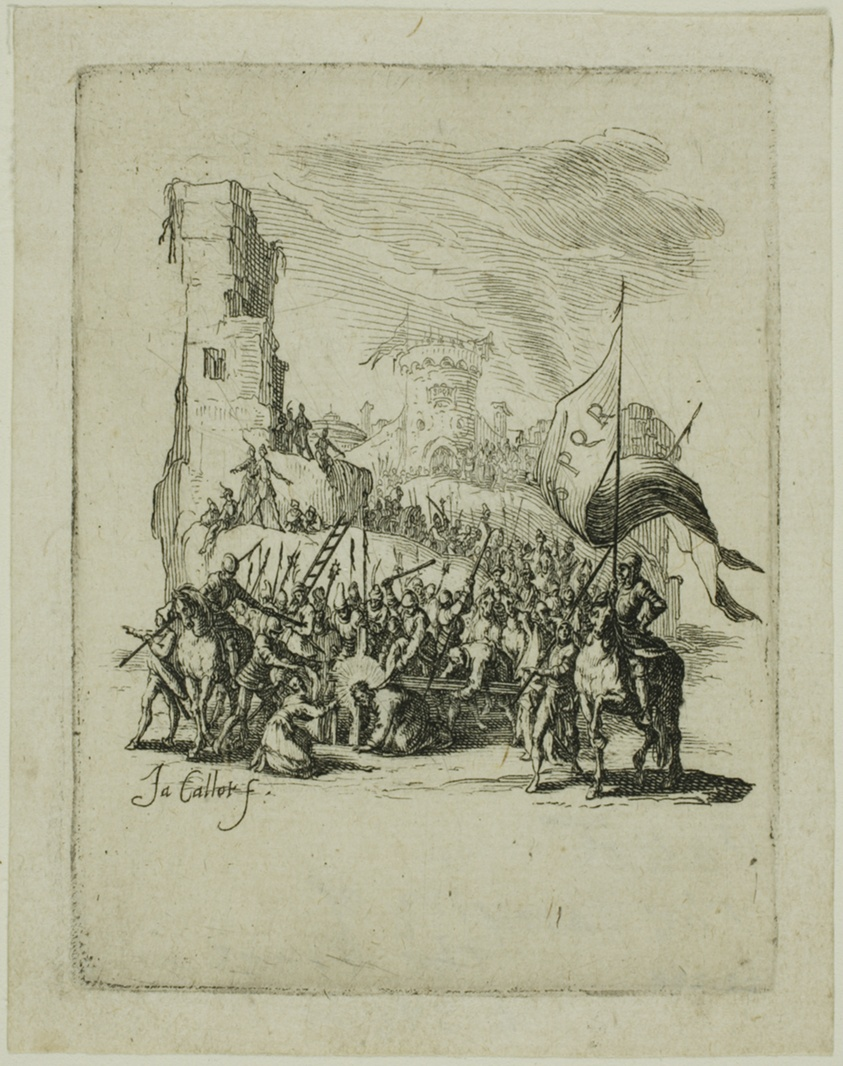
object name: Print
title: Christ Carrying the Cross, from The Small Passion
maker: Jacques Callot (French, 1592-1635)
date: 1624/31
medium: Etching on ivory laid paper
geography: France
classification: etching; print; prints and drawing